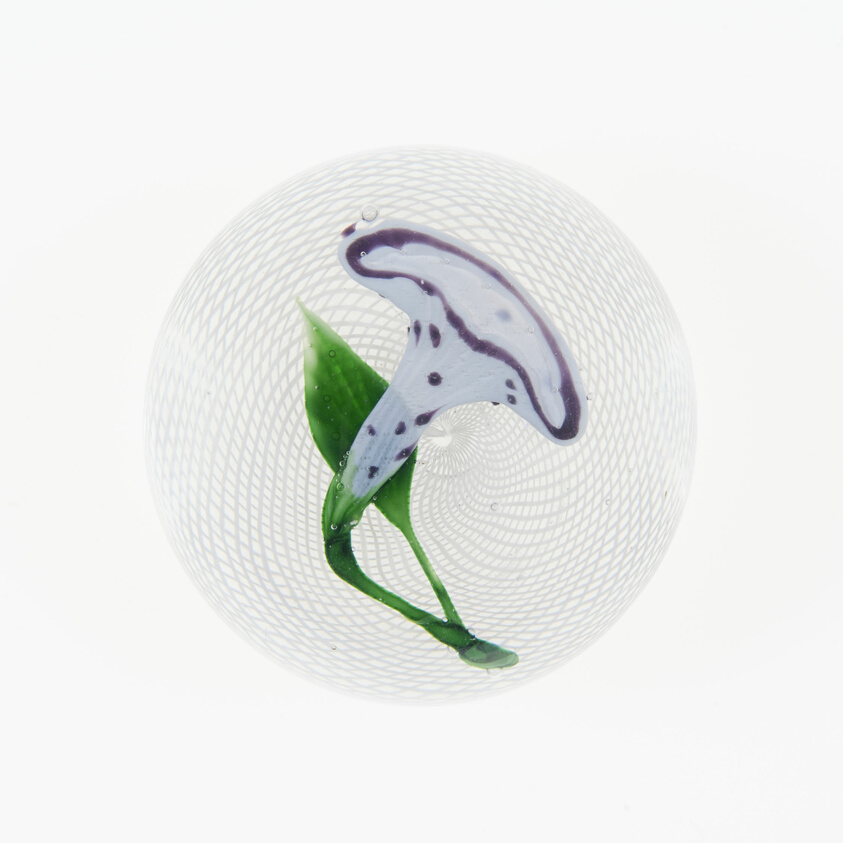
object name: Glass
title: Paperweight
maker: Clichy Glassworks (Cristalleries de Clichy); Clichy, France, 1837-1885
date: c. 1845/60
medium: Glass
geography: France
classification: paperweight; glass